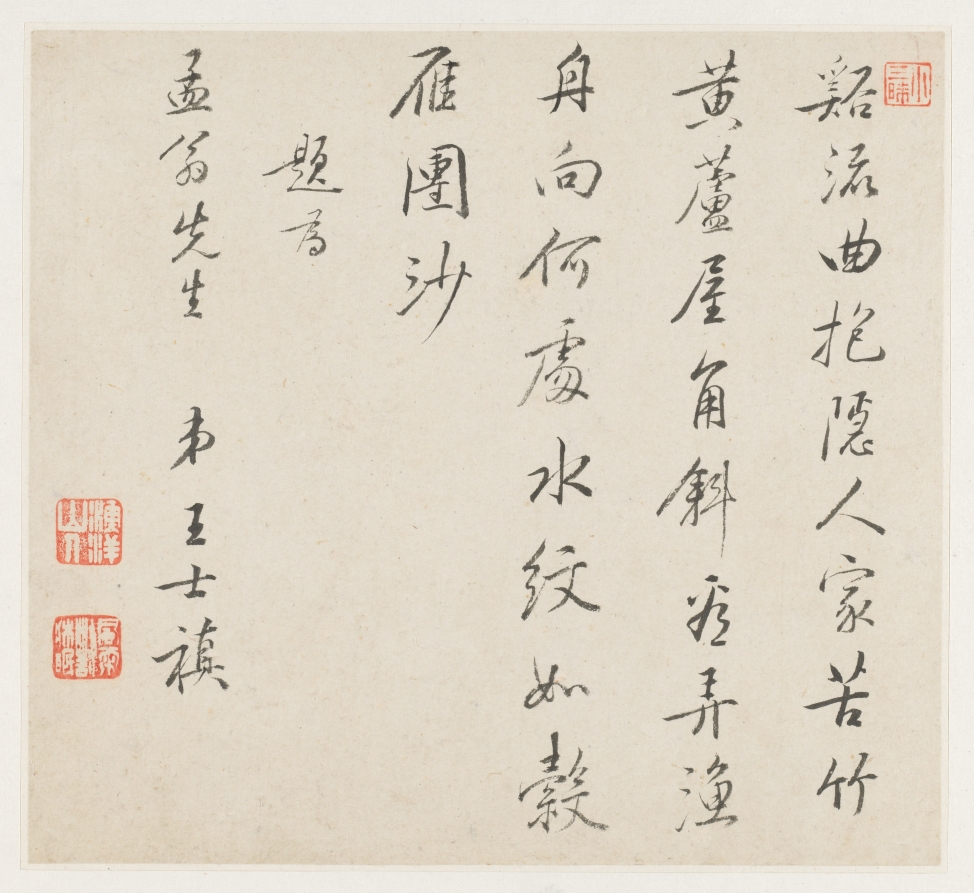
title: Album of Landscapes: Leaf 2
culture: China, Qing dynasty (1644-1911)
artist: Wang Gai (Chinese, active c. 1677–1705)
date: 1677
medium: album leaf, ink and light color on paper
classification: Painting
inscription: Poem by Wang Shih-chen